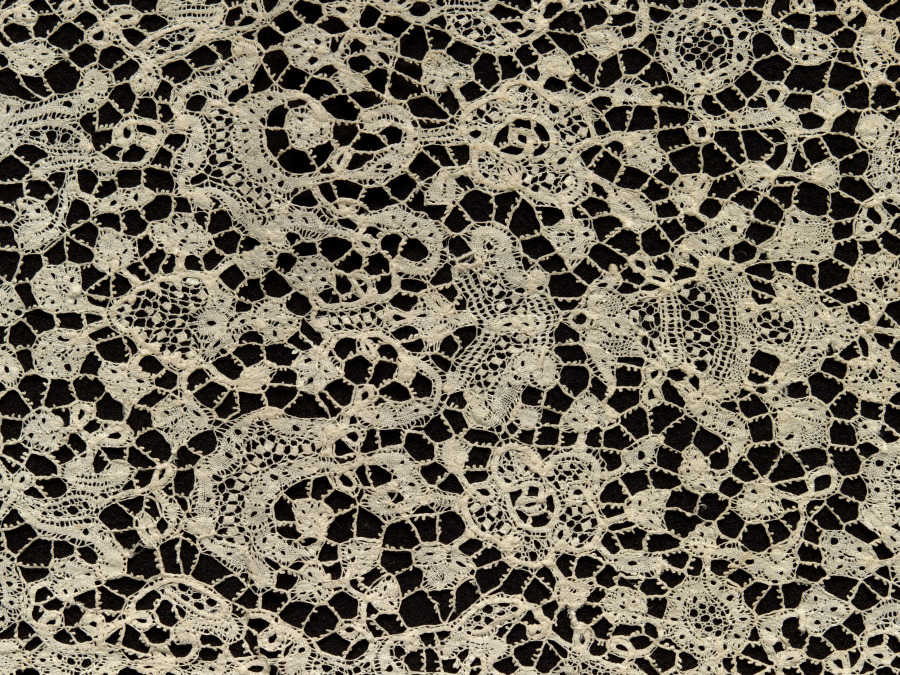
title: Lace Lappets and Edging for Cap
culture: Belgium (Flanders)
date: 1700–1720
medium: Linen: bobbin lace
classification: Lace